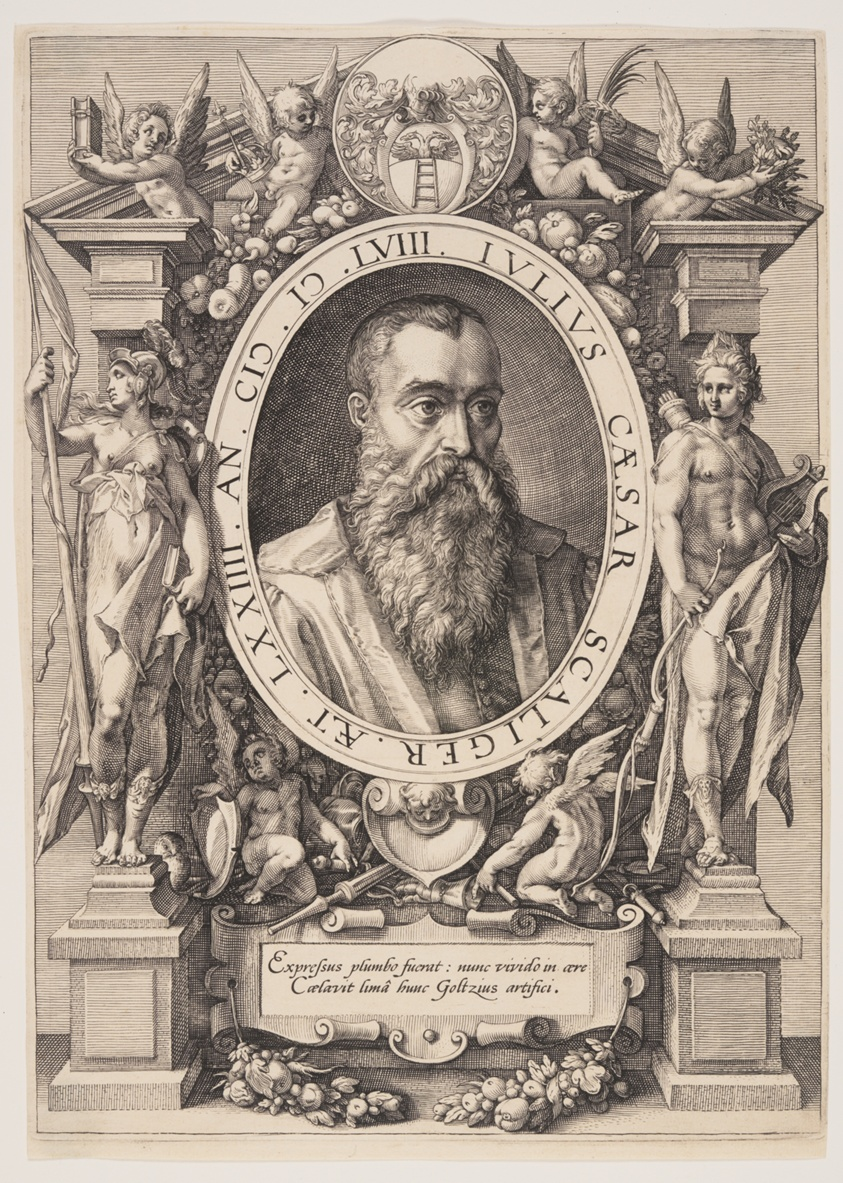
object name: Print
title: Portrait of Julius Caesar Scaliger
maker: Hendrick Goltzius (Dutch, 1558–1617)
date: 1592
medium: Engraving on laid paper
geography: Netherlands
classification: engraving; paper; print; prints and drawing